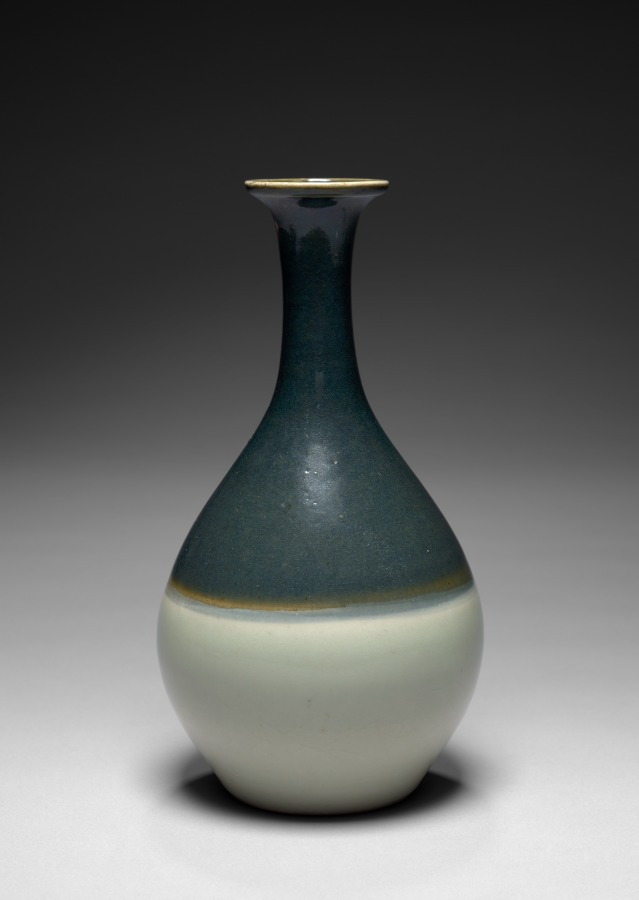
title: Sake Flask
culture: Japan, Edo period (1615–1868)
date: mid- to late 1600s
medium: porcelain with underglaze blue and overglaze celadon decoration (Hizen ware, Arita type, Imari style)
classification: Ceramic